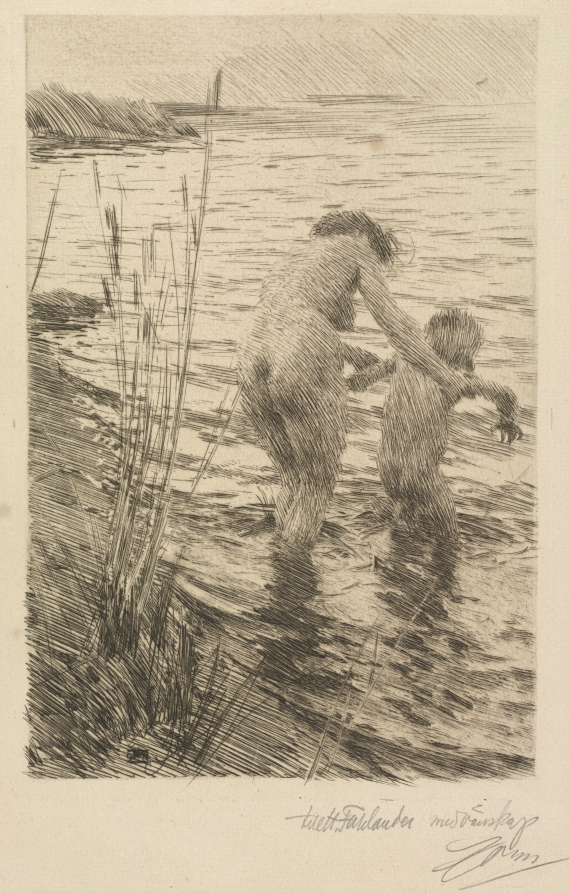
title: Première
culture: Sweden, late 19th Century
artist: Anders Zorn (Swedish, 1860–1920)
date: 1890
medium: etching and drypoint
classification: Print